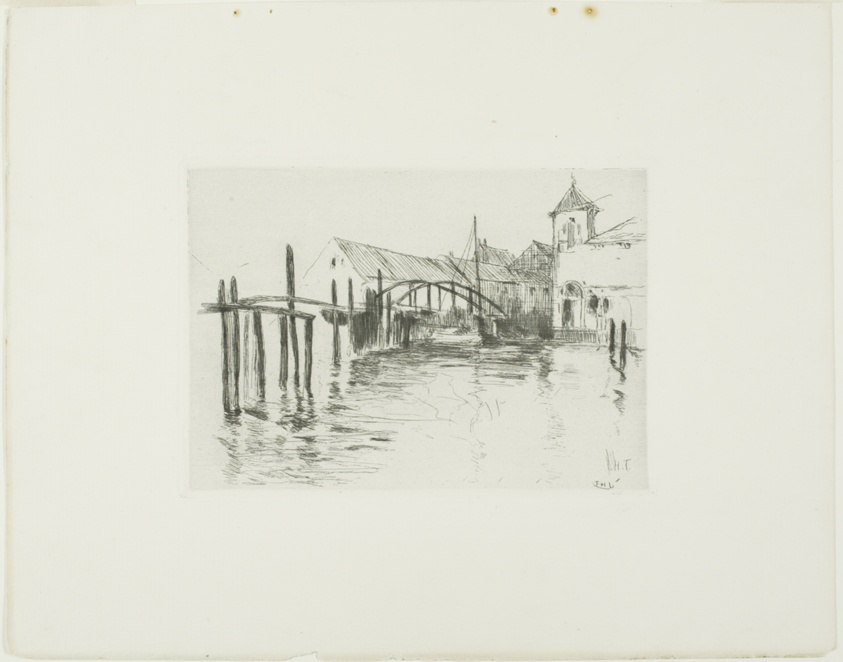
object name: Print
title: Dock at Newport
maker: John Henry Twachtman (American, 1853-1902)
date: 1893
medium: Etching on ivory laid paper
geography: United States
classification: etching; print; prints and drawing